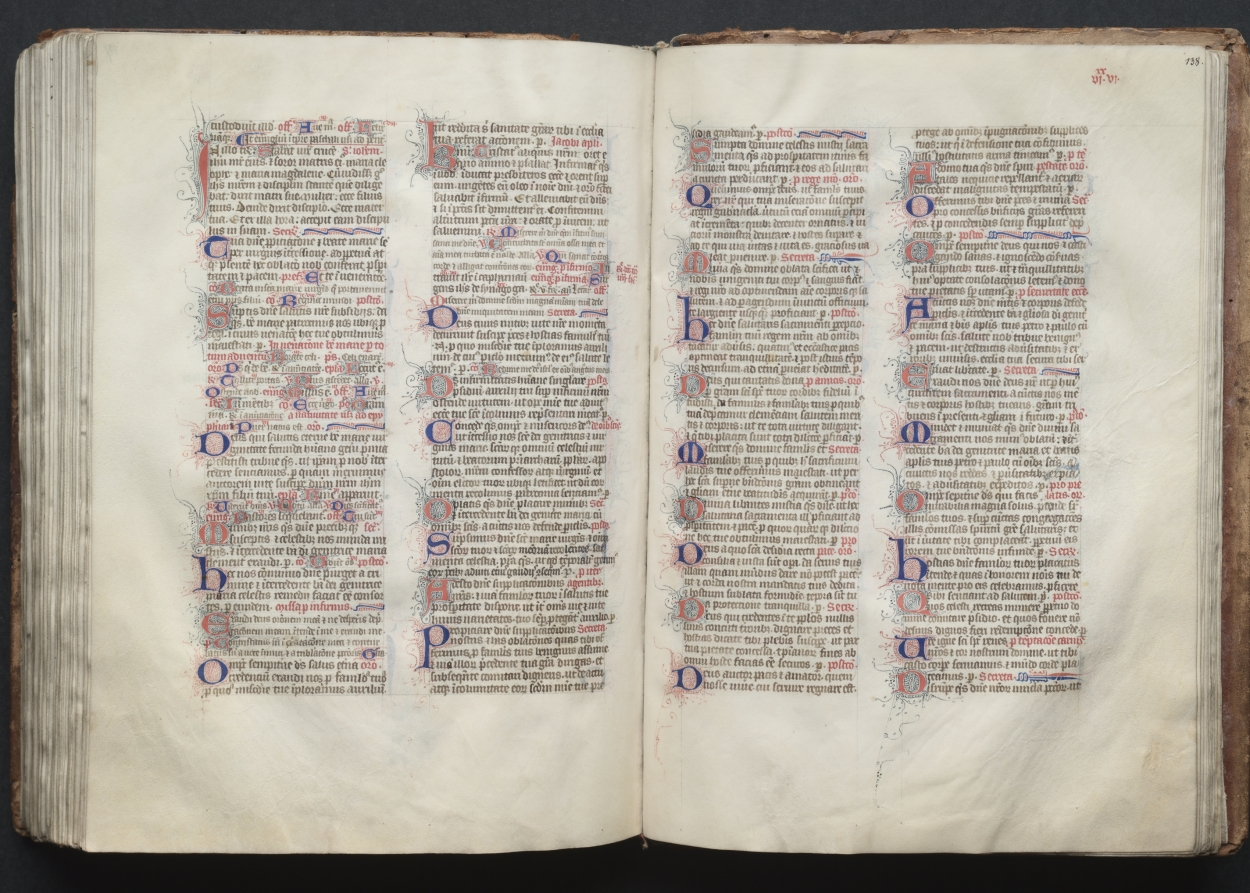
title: The Gotha Missal: Fol. 138r, Text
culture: France, Paris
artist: Master of the Boqueteaux (French)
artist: and Workshop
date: c. 1375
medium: ink, tempera, and gold on vellum; blind-tooled leather binding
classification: Bound Volume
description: The style and quality of this manuscript's decoration is typical of deluxe Parisian books made for aristocratic or royal patrons. Most of the book's decoration appears to be the work of the Master of the Boqueteaux, an artist active at the court of King Charles V (died 1380). His style was apparently shared by a number of book illuminators working in and around Paris. It is very possible that the Gotha Missal belonged to Charles V, but is not provable because the manuscript has no royal portraits and lacks a colophon. Given the book's magnificent decoration, however, it would seem that it was produced for a Valois prince, if not for the king himself. The manuscript receives its name from the German dukes of Gotha, its later owners.